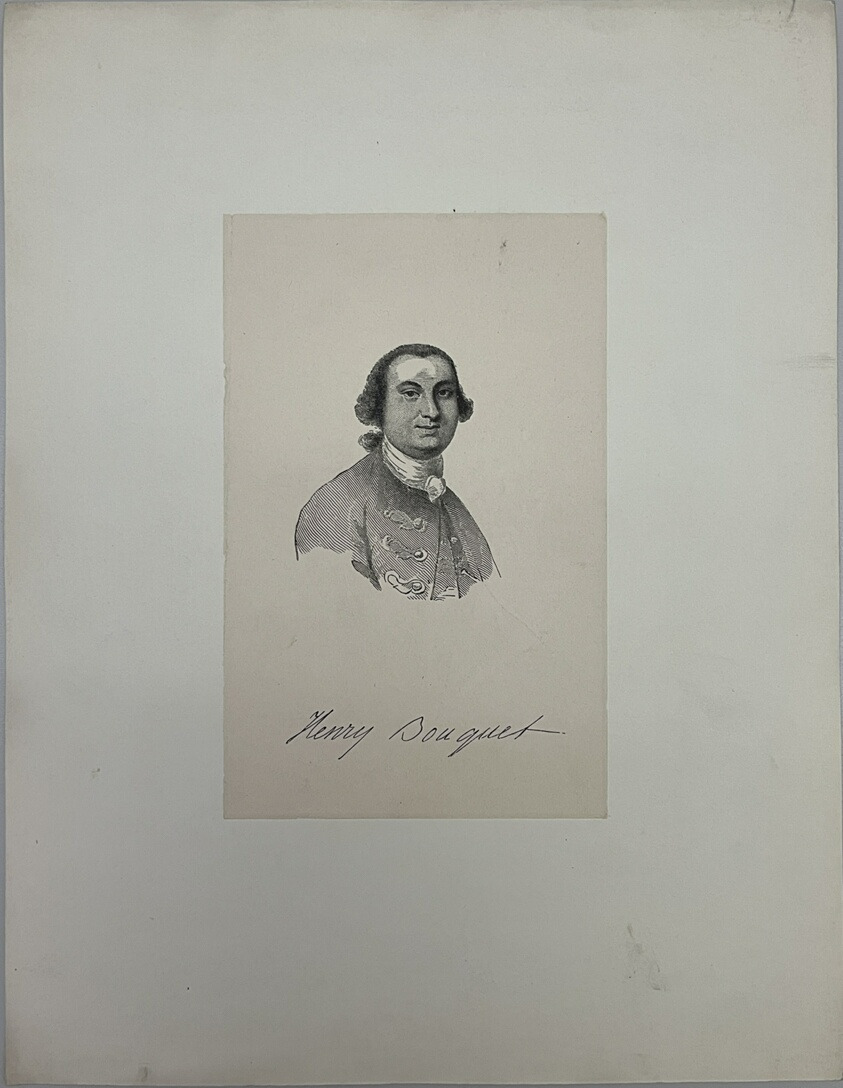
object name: Print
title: Henry Bouguet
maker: Artist Unknown (Likely American or British, 19th century)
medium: Etching on paper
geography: United States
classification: reproduction; print; prints and drawing